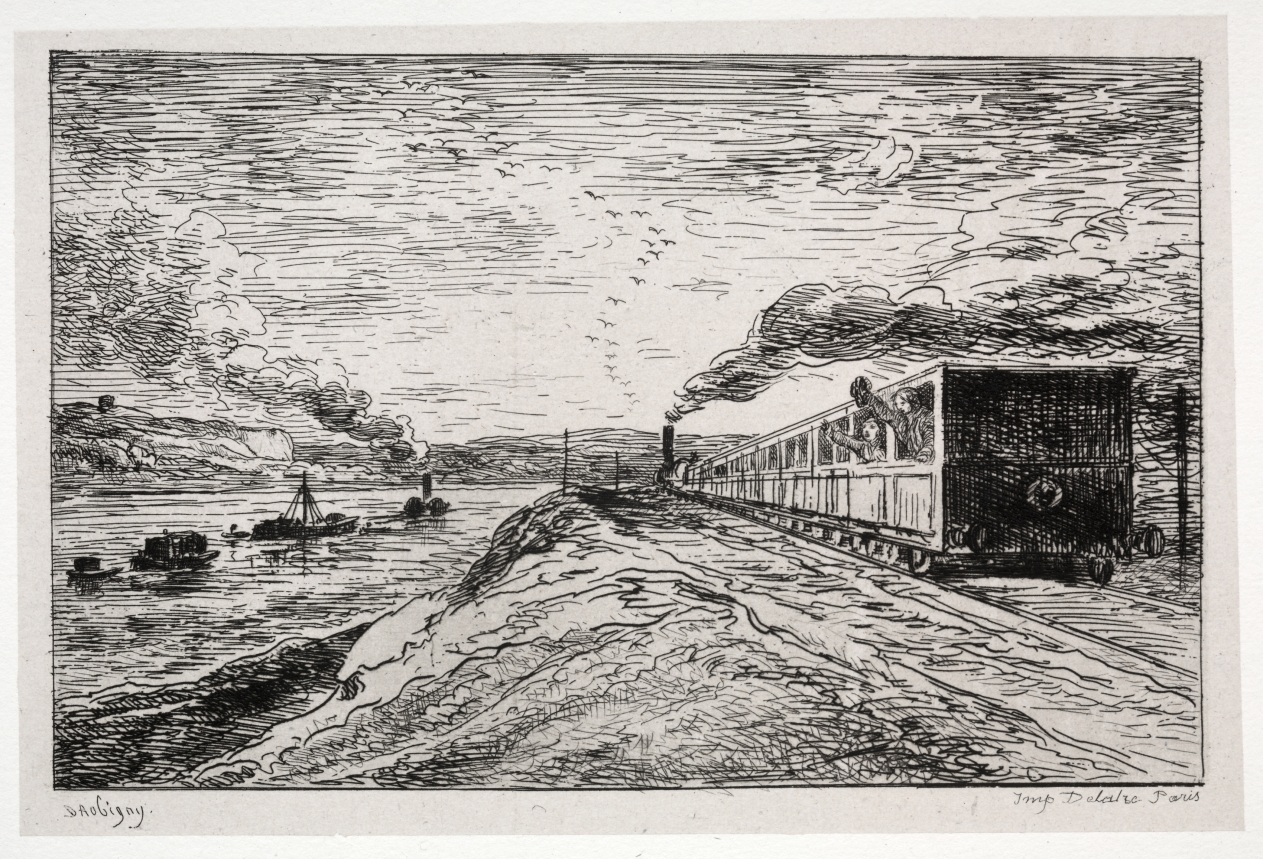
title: The Boat Trip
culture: France, 19th century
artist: Charles François Daubigny (French, 1817–1878)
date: 1861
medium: 16 etchings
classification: Portfolio